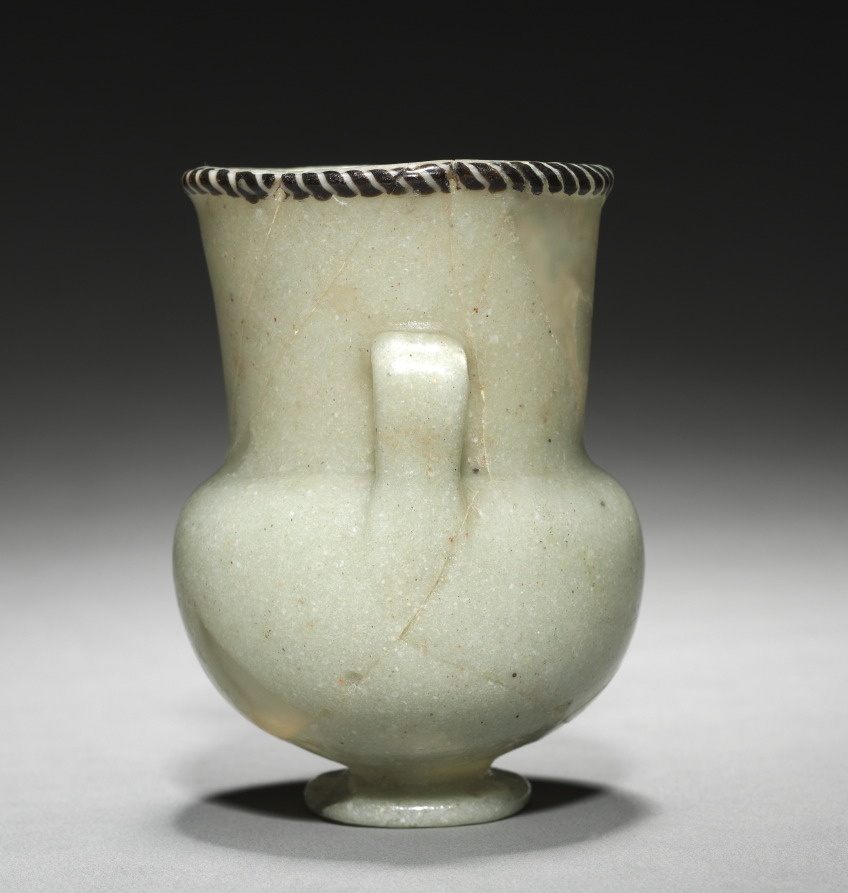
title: Unguent Bottle (Krateriskos)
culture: Egypt, New Kingdom (1540–1069 BCE), Dynasty 18, post-Amarna period or later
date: c. 1336–1295 BCE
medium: glass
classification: Vessels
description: This was probably the most popular type of Egyptian glass vessel. The milky white to sea green-colored fabric and monochrome decorative scheme are reminiscent of Egyptian alabaster. That the Egyptians would make an association between glass and stone is only natural, as the Egyptian name for glass was inr n(y) wdh or "the flowing stone."